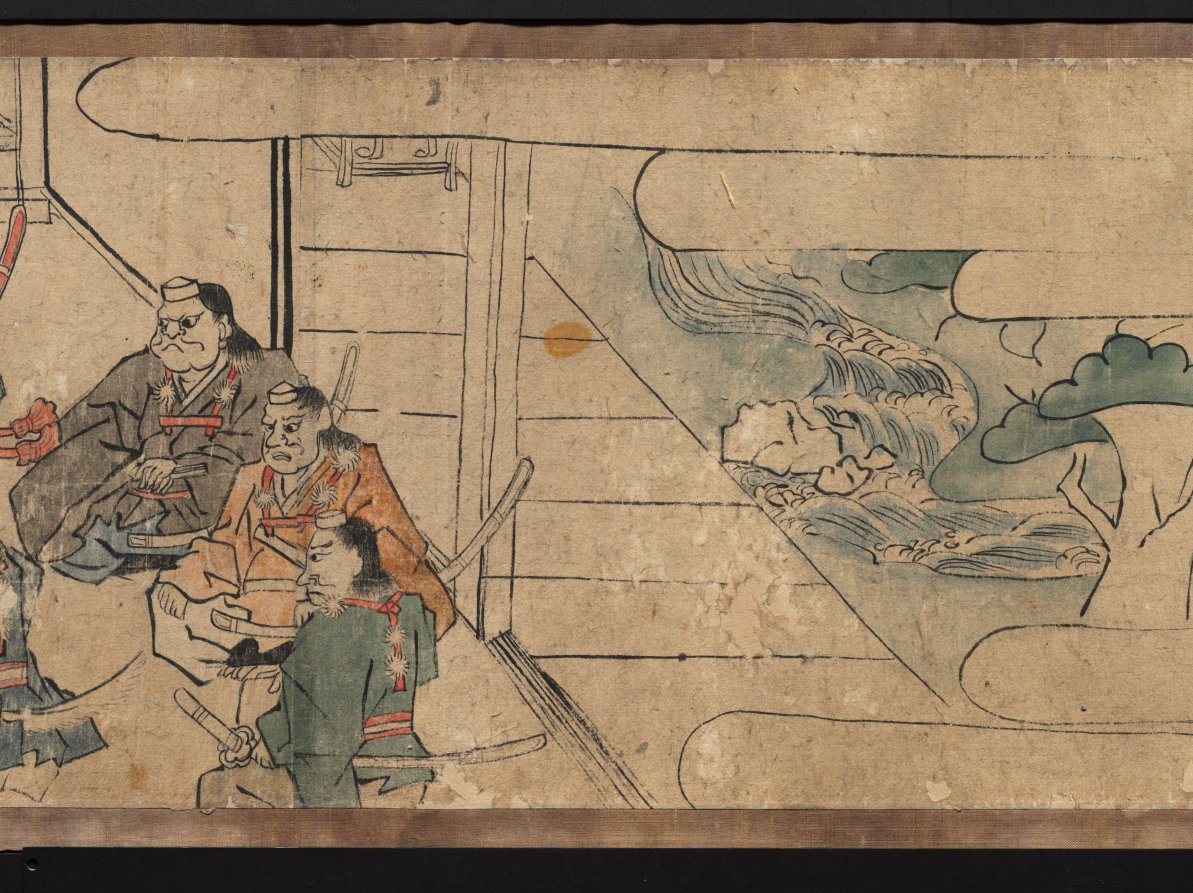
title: Oeyama Engi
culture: Japan, Edo period (1615–1868)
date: 1615–1868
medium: one of a pair of handscrolls; ink and color on paper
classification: Painting